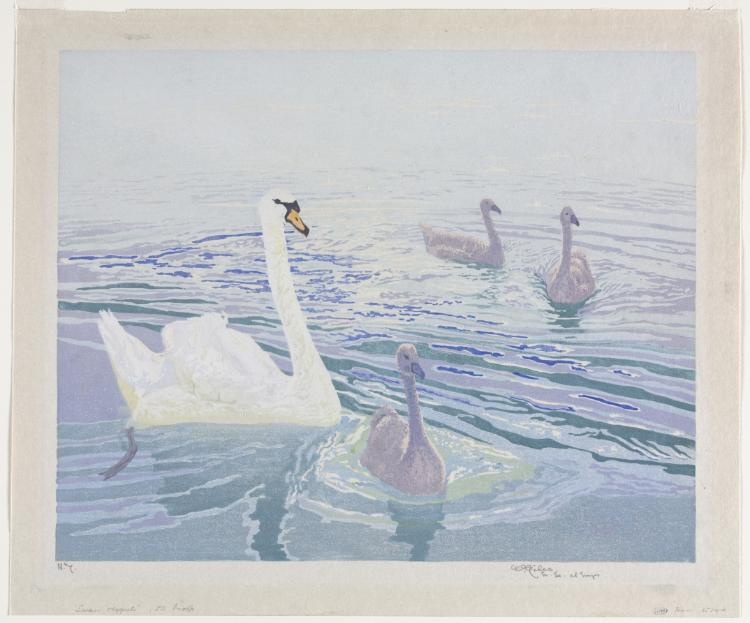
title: Swans and Cygnets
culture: England, 20th century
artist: William Giles (British, 1872–1939)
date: 1911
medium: color woodcut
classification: Print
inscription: lower margin, in graphite: No. 7/ W. Giles ?n.sc.etimps; bottom edge, in graphite: Swan and Cygnets, 50 proofs from wood